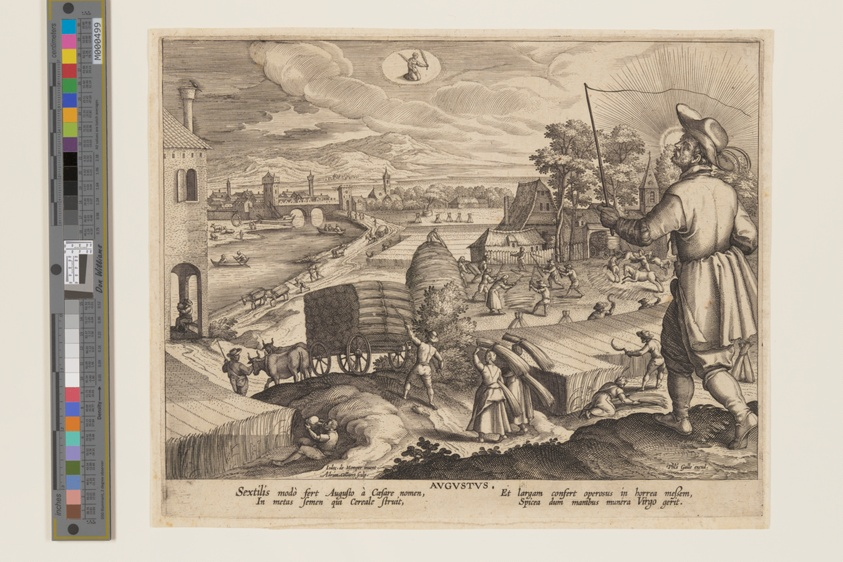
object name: Print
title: August, from Twelve Months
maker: Adriaen Collaert (Flemish, c. 1560–1618); after Joos de Momper (Flemish, 1564-1635)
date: 1609-1610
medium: Engraving on ivory laid paper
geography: Flanders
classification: engraving; paper; print; prints and drawing